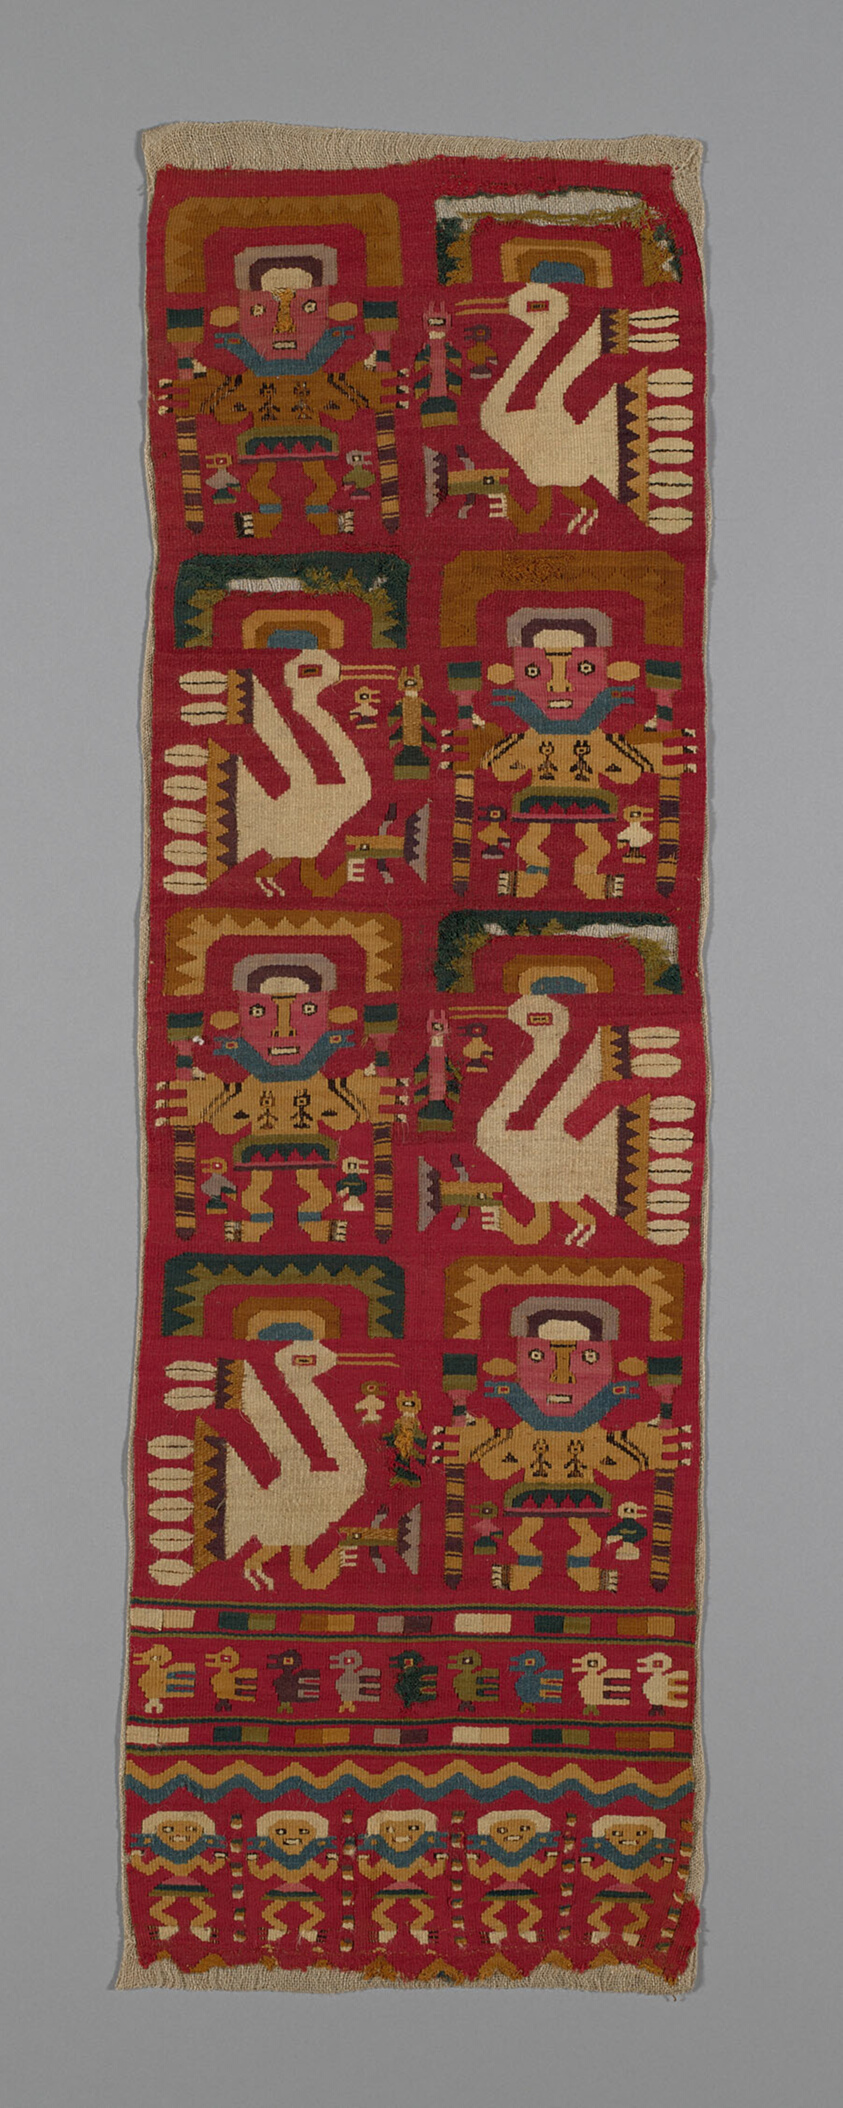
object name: Textile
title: Panel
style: lambayeque, Pre-Columbian, middle horizon, americas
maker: Lambayeque (North coast, Peru)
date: 1000/1476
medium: Cotton and wool (camelid), slit tapestry weave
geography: Peru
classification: weaving; textile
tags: birds, animals, staffs, fish, anthropomorphic figure, geometric motif, headdresses, human, super/natural